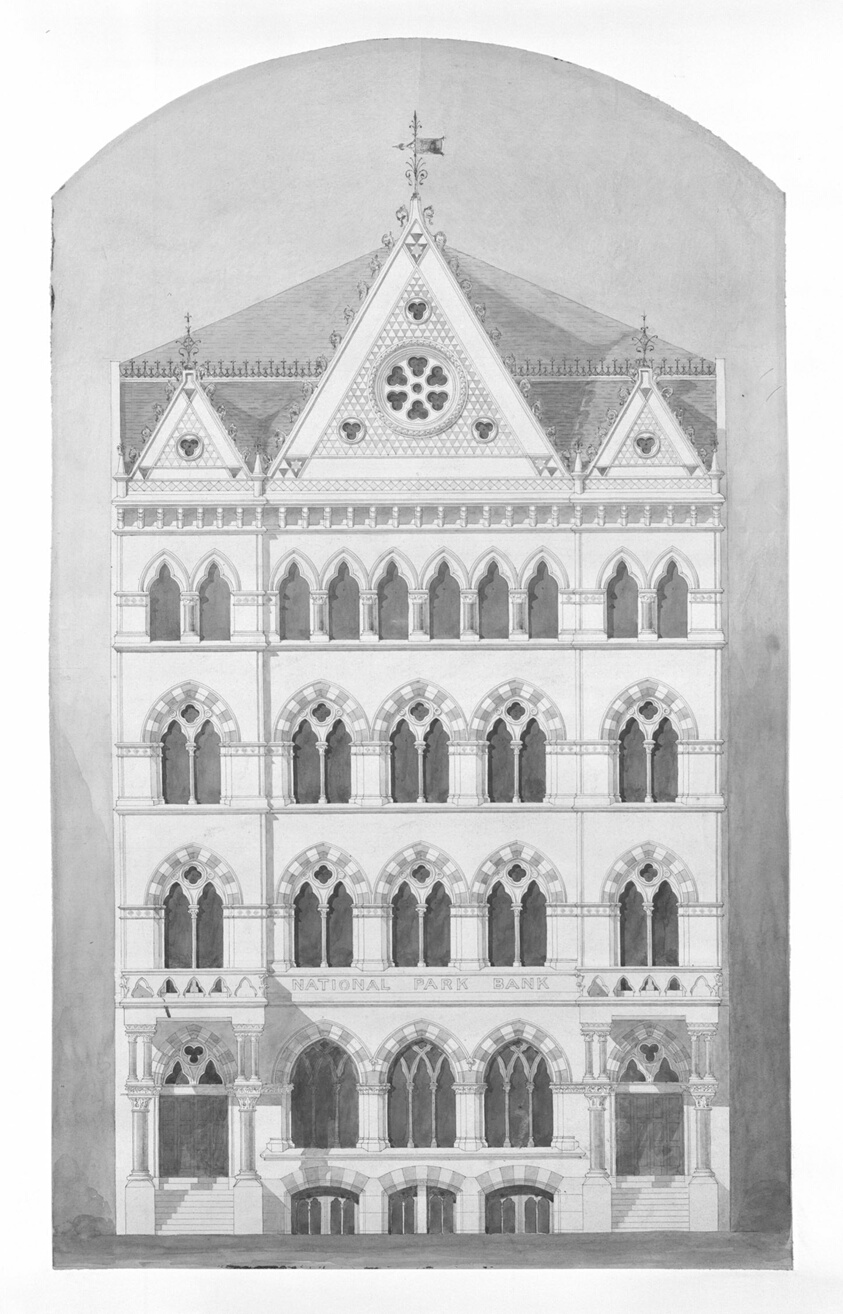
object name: Architectural Drawing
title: National Park Bank, New York City, New York, Competition Design Drawing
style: 19th century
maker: Peter Bonnett Wight (American, 1838–1925)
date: c. 1866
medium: Ink and watercolor on paper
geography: New York City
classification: presentation drawing; architectural drawing; architecture; design drawing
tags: buildings, city scenes, urban planning, design drawing, New York City, New York